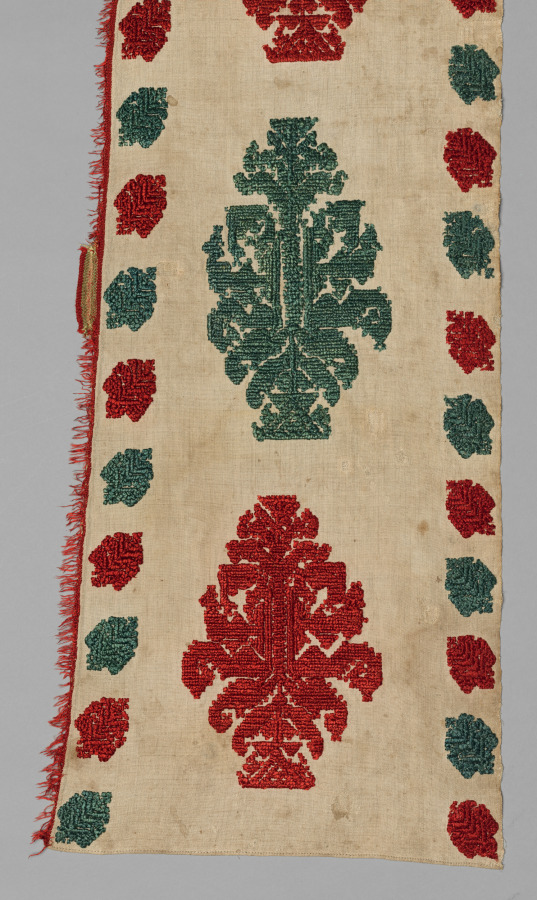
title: Portion of a Bed Tent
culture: Greece, Dodecanese Islands, Rhodes, 18th century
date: 1700s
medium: embroidery: silk on linen tabby ground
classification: Embroidery